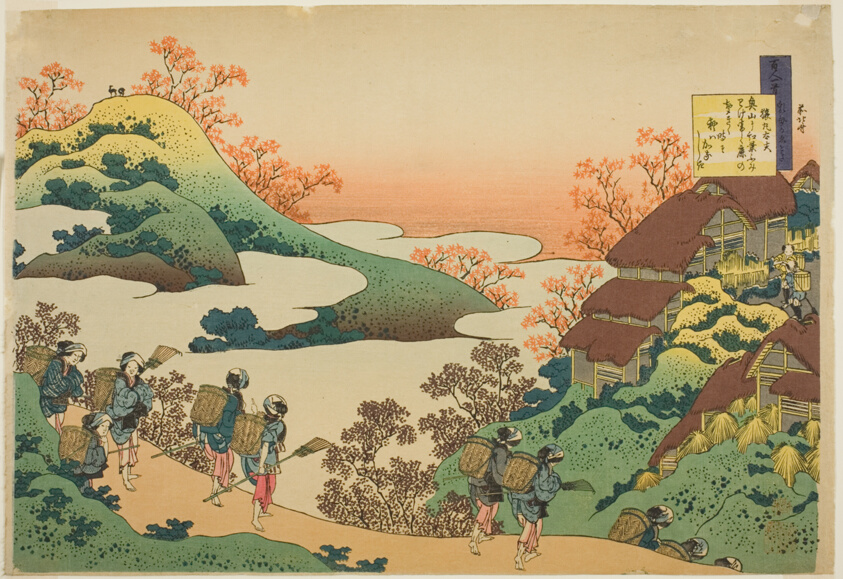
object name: Print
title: Poem by Sarumaru Dayu, from the series "One Hundred Poems Explained by the Nurse (Hyakunin isshu uba ga etoki)"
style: Japanese (culture or style)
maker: Katsushika Hokusai 葛飾 北斎; Japanese, 1760-1849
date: 1835–36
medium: Color woodblock print; yoko ōban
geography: Japan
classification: woodblock print; print; asian art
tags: landscapes